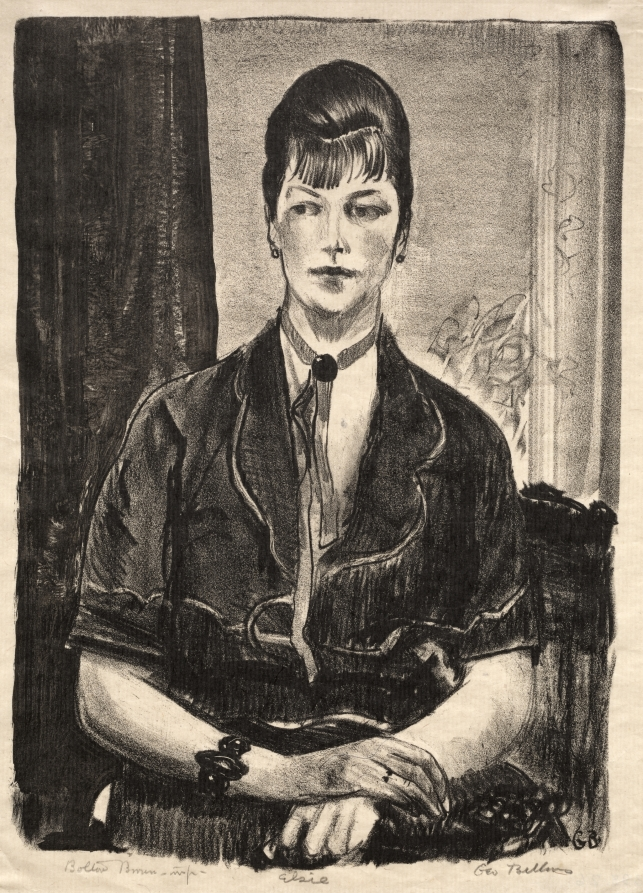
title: Elsie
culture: America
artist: George Bellows (American, 1882–1925)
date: 1921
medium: lithograph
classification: Print